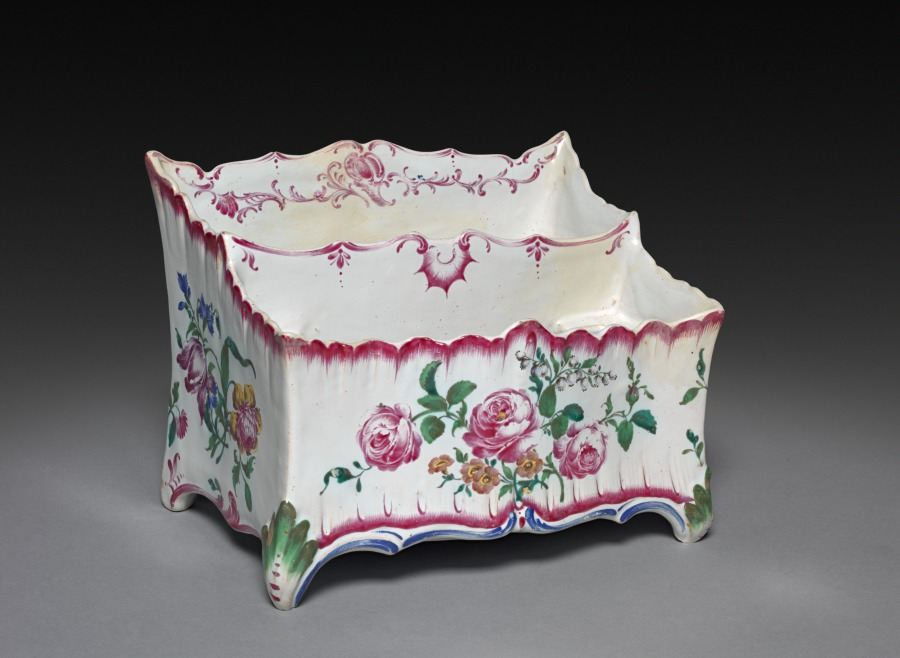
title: Flower Holder (Bouquetiere)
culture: France, 18th century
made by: Sceaux Factory (French, active 1748–66)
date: 1765–1770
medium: faience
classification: Ceramic